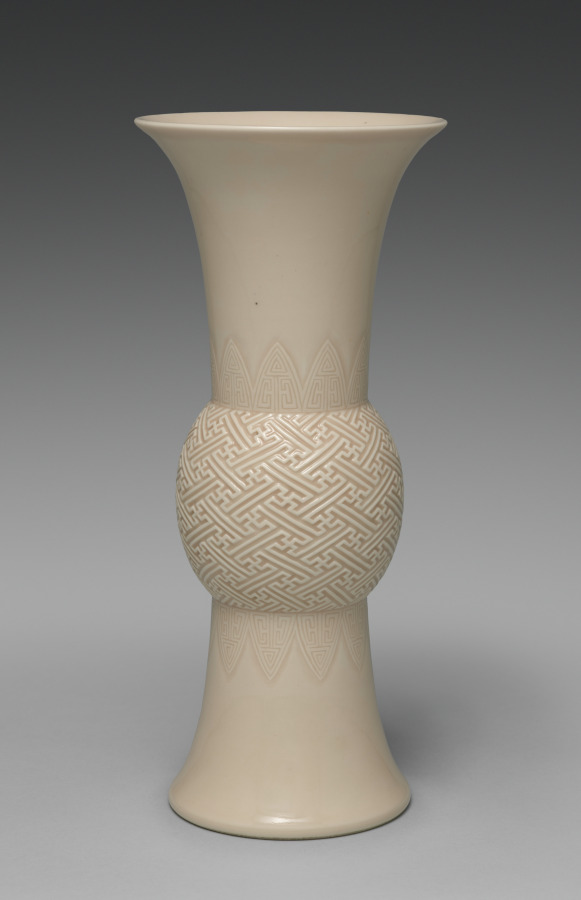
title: Gu-Shaped Flower Vase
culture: Japan, Meiji period (1868–1912)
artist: Seifū Yohei III (Japanese, 1851–1914)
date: 1893–97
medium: Glazed porcelain with molded and carved designs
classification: Ceramic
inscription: 大日本清風造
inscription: This gu-shaped vase has “cherry blossom glaze” (ōkayū), according to the inscription on its box.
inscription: A label affixed to the side of the box gives a sense of how previous owners conceived of the piece. Although the label is partially abraded, one can make out the character nezu 鼠, used in the names of numerous light pinks, from Naniwa pink (Osaka pink) to Miyako pink (Kyoto, or capital, pink). Also legible is the phrase hakugōrai, a broad term that can describe a shade of white associated with ceramics discovered in Korean tombs, but often applied to other ceramics of similar coloration, many from Chinese kilns, including Ding (J. Tei) ware of the Northern Song dynasty.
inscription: 清風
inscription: 帝室技芸員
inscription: 清風與平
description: Seifū Yohei III was the most prominent head of a ceramics studio in Kyoto that specialized in Chinese-style porcelains and especially items for use in sencha (煎茶), or the drinking of steeped-leaf tea with companions. Sencha was popular among the bunjin of Kyoto and Osaka, who often enjoyed it as part of their emulation of Chinese culture. While sencha was by design less formal than the Japanese tea ceremony, it still featured the display of treasured objects. Prized Chinese antiquities were generally unobtainable, so substitutes such as the Gu-Shaped Flower Vase were much in demand.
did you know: This gu-shaped vase has “cherry blossom glaze” (ōkayū), which Yohei III invented in 1890.